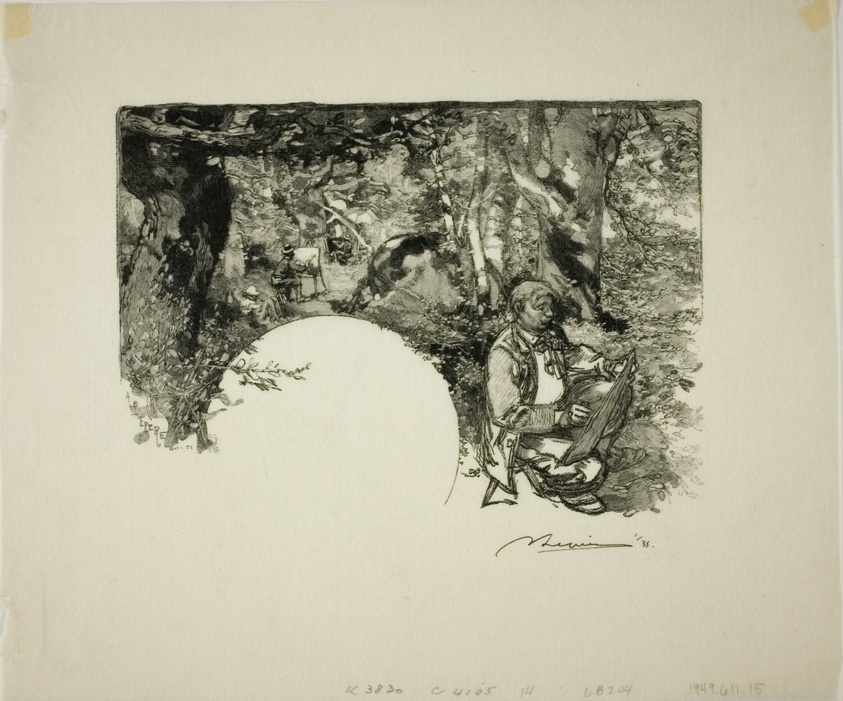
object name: Print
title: Painters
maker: Louis Auguste Lepère (French, 1849-1918); published by A. Desmoulins (French, active c. 1908-1910)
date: 1890, published 1908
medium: Wood engraving in black on cream laid Japanese paper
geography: France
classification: wood engraving; print; prints and drawing